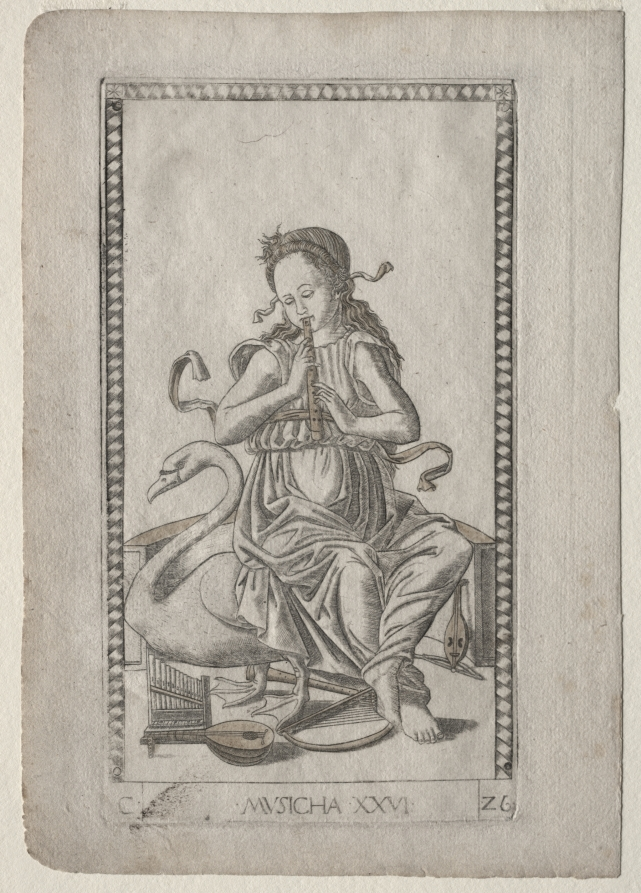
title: Music (from the Tarocchi, series C: Liberal Arts, #26)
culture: Italy, Ferrara, 15th century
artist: Master of the E-Series Tarocchi (Italian, active 1460s)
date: before 1467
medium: engraving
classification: Print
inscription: Lettered below the image of Musicha (Music): C· / ·MUSICHA·XXVI· / ·26·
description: This engraving is part of the group “C” named Liberal Arts. Conceptually, the liberal arts descended from classical antiquity, and were divided into the Trivium (Grammar, Rhetoric, and Dialectic or Logic) and the Quadrivium (Music, Geometry, Arithmetic, and Astronomy). In the Tarocchi set the total number was risen to ten, with the addition of the three disciplines (Poetry, Philosophy, and Theology). The liberal arts denoted knowledge or skills considered necessary to participate in a free society. By the late Middle Ages, they began to be represented in the visual arts as womanlike allegories. Here, Musicha (Music) is personified as a young female figure seated upon a swan and playing a recorder, known simply as a flute in the 15th century. At her feet are numerous musical instruments including a portative organ, lute, shawm, harp, and rebec. The swan can be interpreted as a symbol of song, based upon the ancient belief that this bird, which is mute all its life, sings in exquisite tones shortly before it dies.